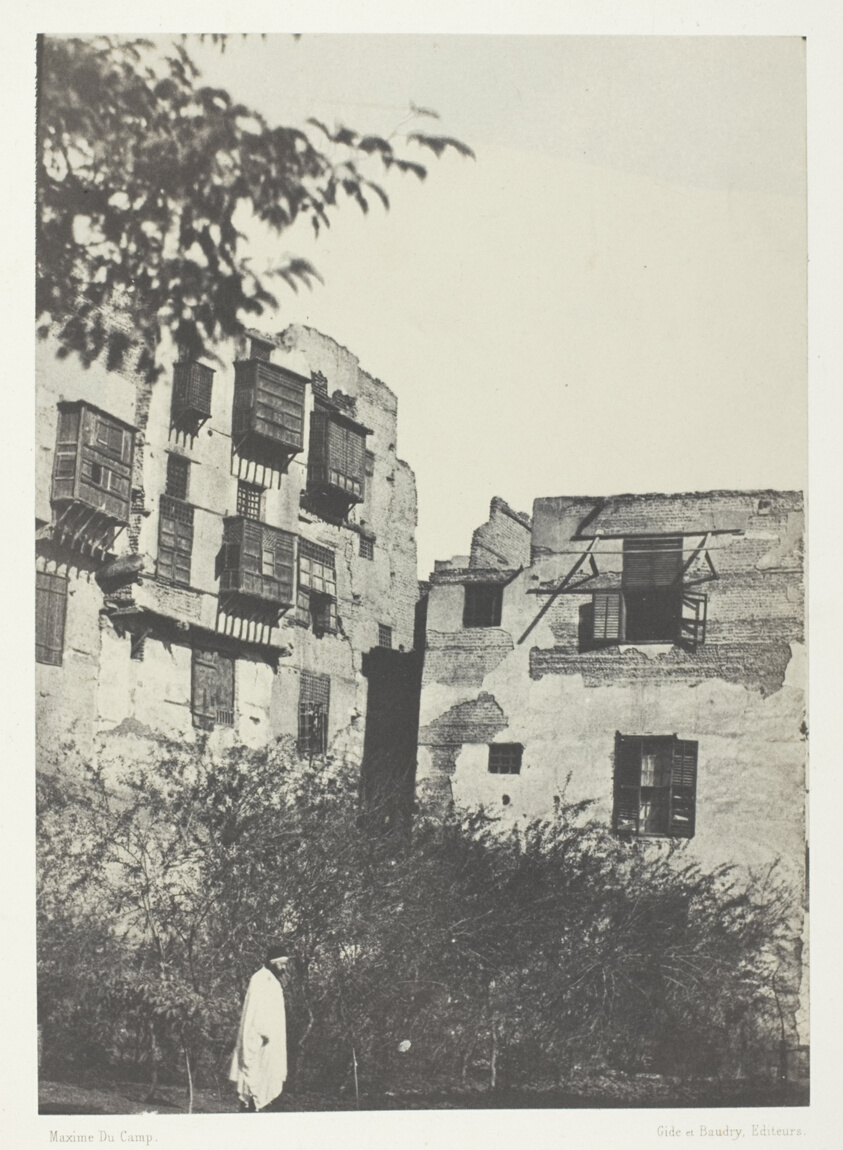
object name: Photograph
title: Maison et Jardin dans le Quartier Frank, Le Kaire, plate 3 from the album "Egypte, Nubie, Palestine et Syrie" (1852)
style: 19th century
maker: Maxime Du Camp (French, 1822–1894)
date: 1849/51, printed 1852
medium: Salted paper print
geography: France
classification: salted paper print; photographic process; photography; photograph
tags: Collected by Hugh Edwards, Egypte, Nubie, Palestine et Syrie